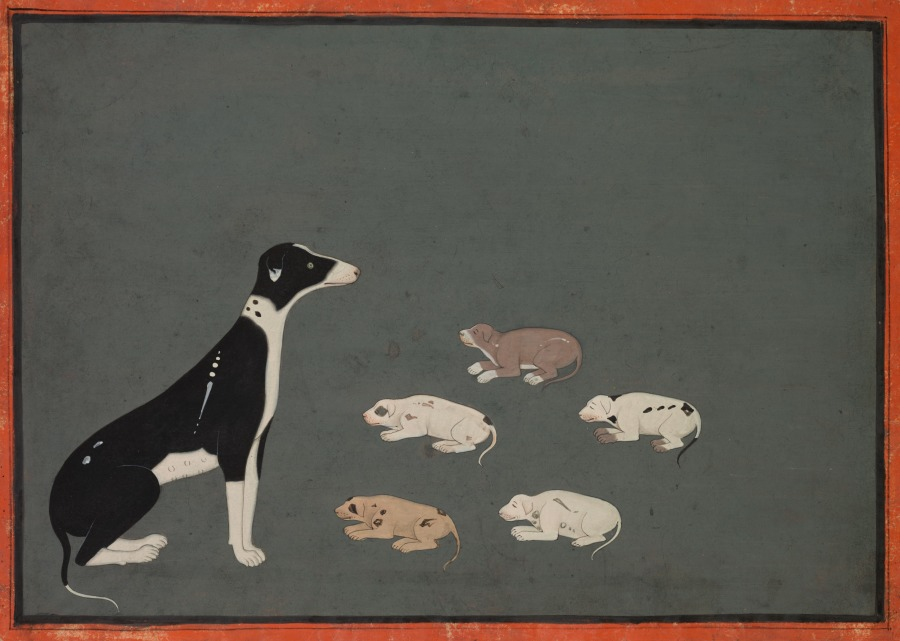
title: Dog with pups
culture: India, Rajasthan, Ajmer, probably Sawar school, 18th century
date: c. 1780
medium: Gum tempera and ink on paper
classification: Painting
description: Dogs were kept in the Mughal imperial palace and attentively cared for by one keeper for every two hunting dogs. Akbar’s biography notes that the emperor liked dogs so much he imported different breeds from distant lands, and Jahangir requested English hunting dogs from the ambassador Sir Thomas Roe. The tradition of collecting and keeping dogs was continued by the succeeding emperors and vassal kings.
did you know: The newborn puppies are still too young to open their eyes.